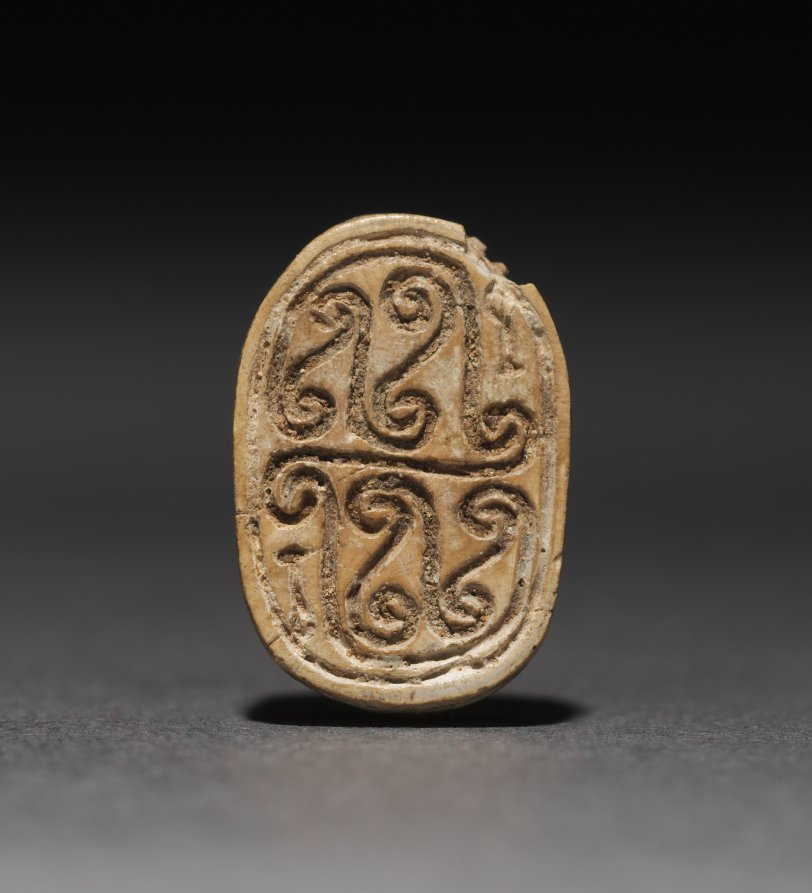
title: Scarab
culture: Egypt, Haraga, Wadi I, no number, Second Intermediate period (1648–1540 BCE)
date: 1648–1540 BCE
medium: turquoise-glazed steatite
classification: Scarabs